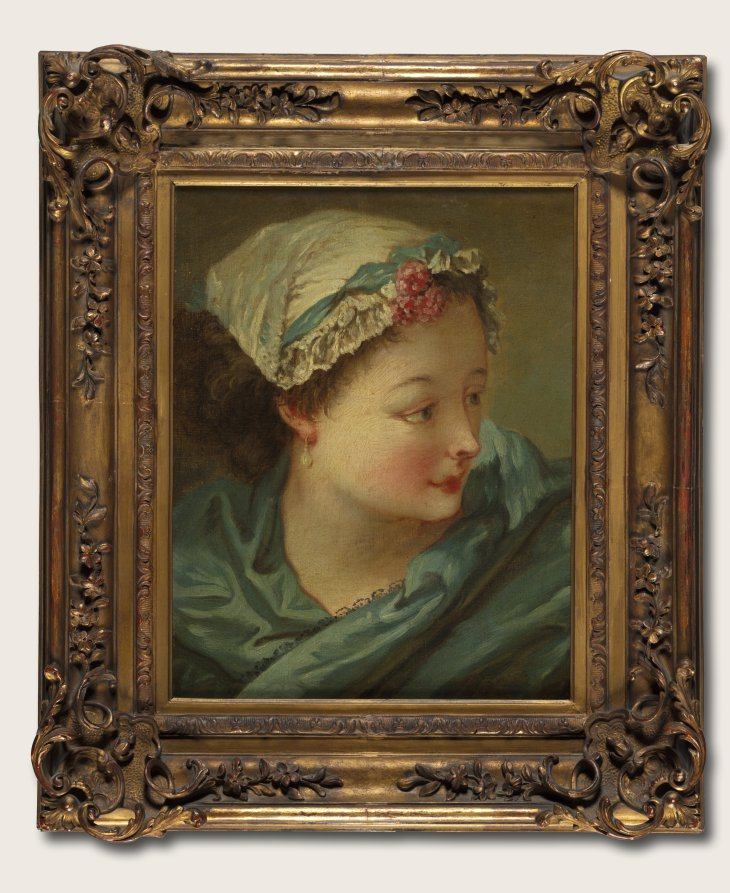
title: Head of a Young Woman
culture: France, 18th century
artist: François Boucher (French, 1703–1770)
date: early 1730s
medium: oil on canvas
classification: Painting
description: This work was catalogued as "style of Chardin" when it entered the museum's collection, and was considered a minor rococo revival work of the 1800s. In 2011, the museum asked Alastair Laing, the leading scholar of the artist Boucher, to study it. He confirmed that the painting is a rare survival from the artist's early career—one of only two known oil studies of this type by the artist.